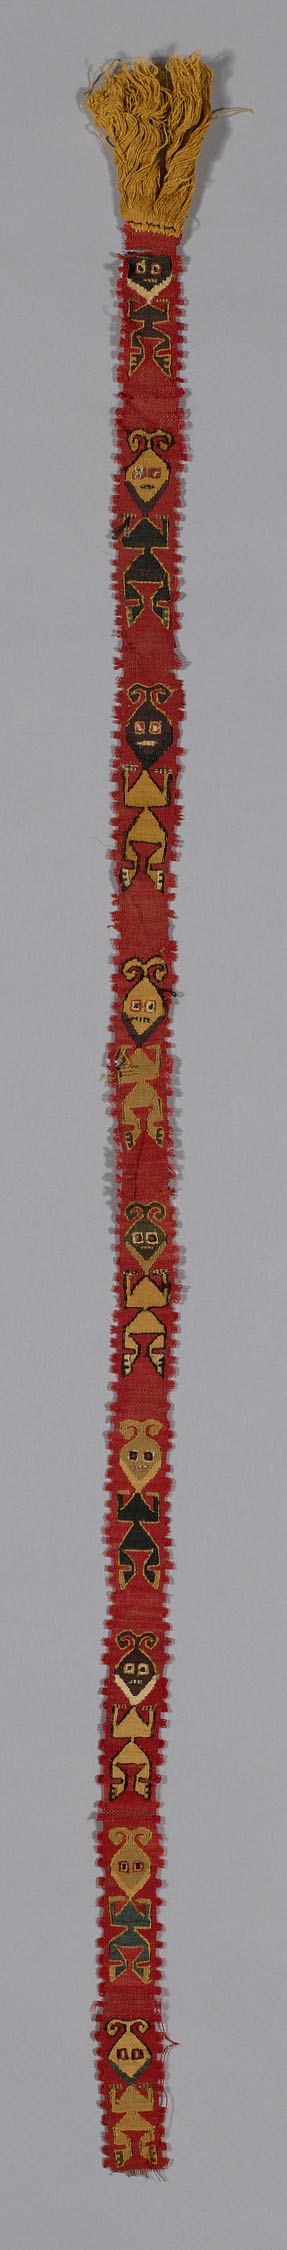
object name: Textile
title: Fragment (Band)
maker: Probably central or south coast, Peru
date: A.D. 1000/1476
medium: Slit tapestry with weft loop fringe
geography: Peru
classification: textile; weaving